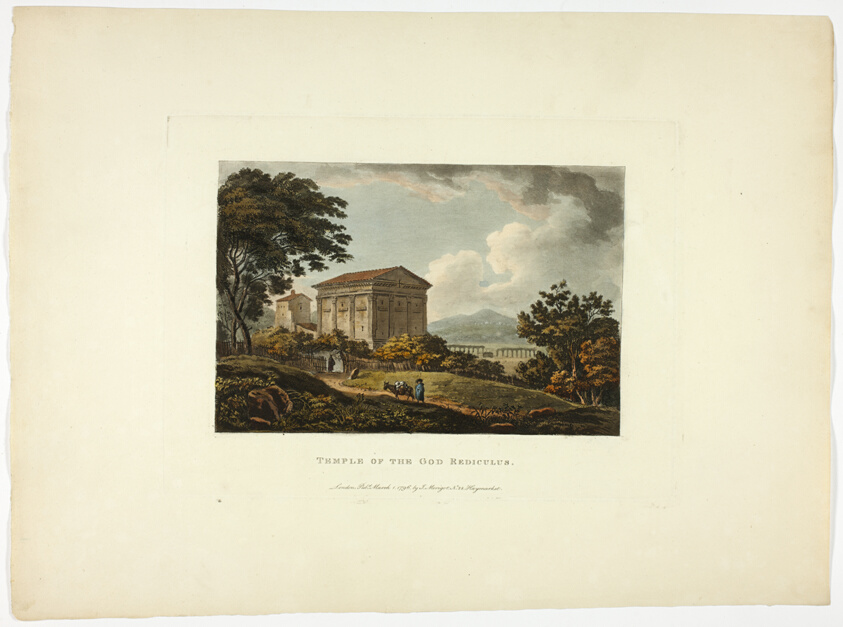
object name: Print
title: Temple of the God Rediculus, plate five from the Ruins of Rome Temple of the God Rediculus, plate five from the Ruins of Rome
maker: M. Dubourg, (English, active 1786-1838); published by J. Merigot (Italian, Unknown)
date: published March 1, 1796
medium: Hand-colored aquatint on paper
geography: England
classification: aquatint; print; prints and drawing